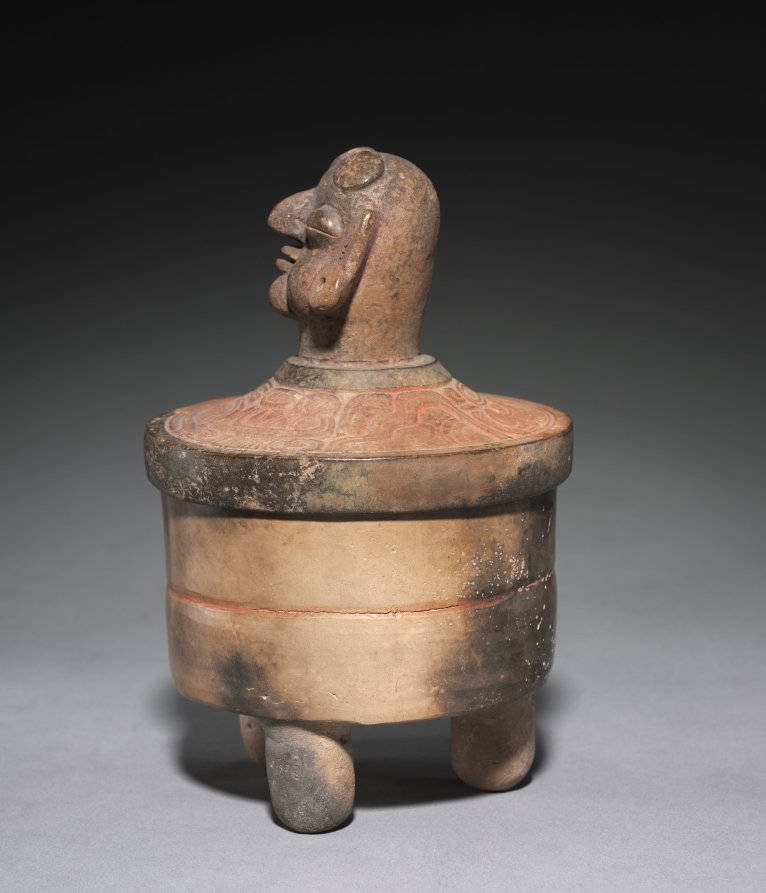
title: Tripod Vessel with Lid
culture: Mexico or Central America, Maya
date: 250–600 CE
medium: earthenware with pigment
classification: Ceramic